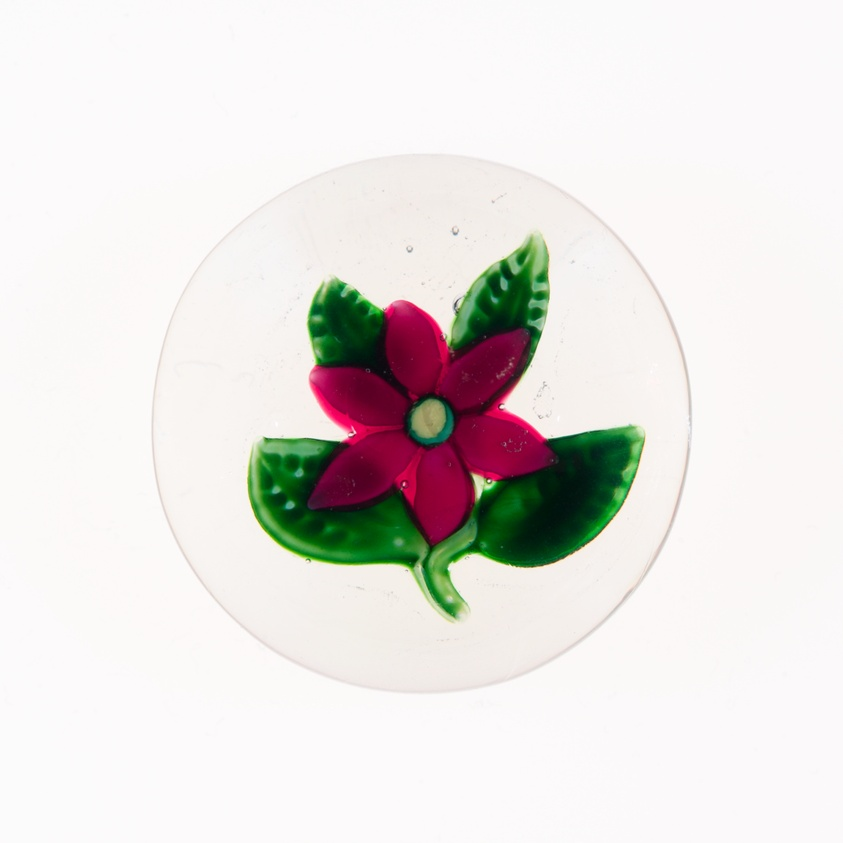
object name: Glass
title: Paperweight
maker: Saint-Louis Glassworks (Cristalleries de Saint-Louis); Lorraine, France, founded 1586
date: 19th century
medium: Glass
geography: Saint-Louis-lès-Bitche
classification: paperweight; lampwork; european decorative arts; glass